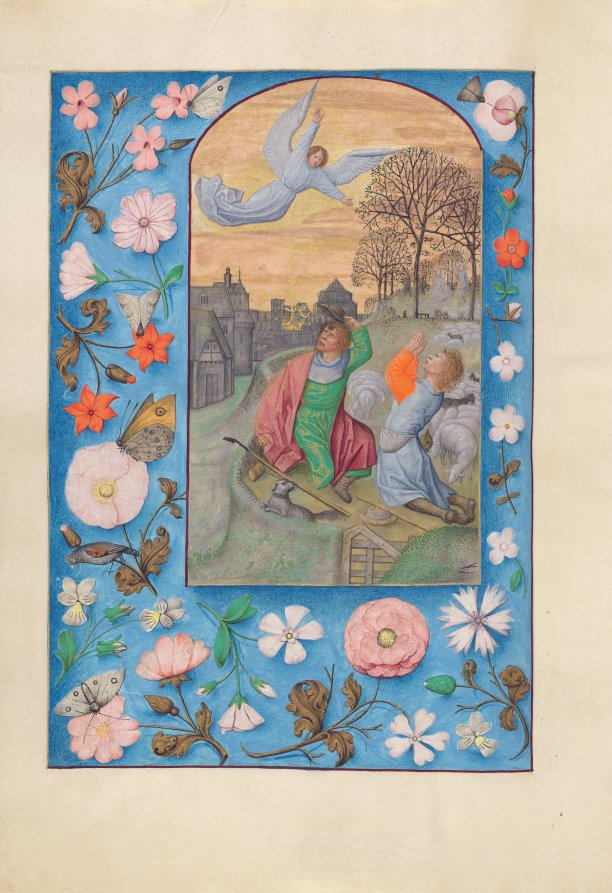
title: Hours of Queen Isabella the Catholic, Queen of Spain: Fol. 131v, Annunciation to the Shepherds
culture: Flanders, Ghent and Bruges, late 15th century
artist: Master of the First Prayerbook of Maximillian (Flemish, c. 1444–1519)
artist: and Associates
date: c. 1500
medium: ink, tempera, and gold on vellum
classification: Bound Volume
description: This manuscript was illuminated by a circle of at least five highly organized manuscript painters active in the Flemish cities of Ghent and Bruges. The principal illuminator was Alexander Bening, who painted the majority of the book's miniatures. Manuscripts produced by this circle of artists are renowned for the decoration of their borders, which typically feature a rich variety of realistically-painted flowers, birds, and butterflies. This prayer book, called a book of hours, was intended not for a cleric, but for the private devotions of a lay person-in this case, Isabella the Catholic, Queen of Spain (1451-1504). Isabella's coat of arms embellishes the book's frontispiece. It is unlikely that the book was commissioned by the Queen herself; rather, she probably received it as a diplomatic gift from someone courting her patronage, perhaps Cardinal Francisco Jimenez de Cisneros. A Franciscan friar, Jimenez was dependent upon Isabella for his advancement, first to the post of Queen's confessor in 1492, and then to Archbishop of Toledo in 1495.